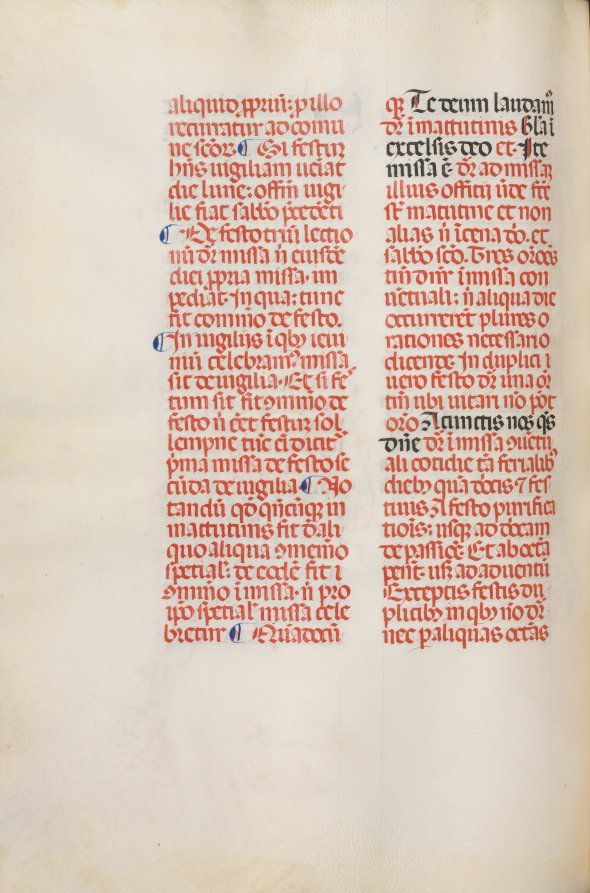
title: Missale: Fol. 173v: Music for "Alleluia" etc. at beginning of Easter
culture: Italy, Perugia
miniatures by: Bartolommeo Caporali (Italian, c. 1420–1503)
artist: assisted by Giapeco Caporali (Italian, d. 1478)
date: 1469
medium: ink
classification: Bound Volume